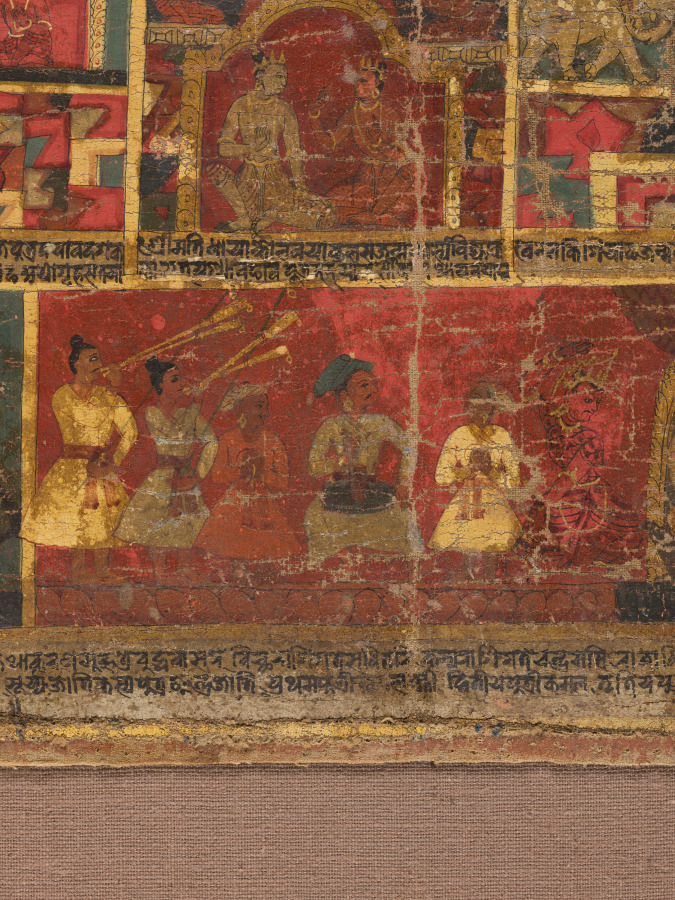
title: Bejeweled Buddha Preaching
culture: Nepal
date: 1648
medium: Gum tempera, ink, and gold on cloth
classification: Painting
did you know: Nepalese devotional paintings on cloth are called "paubha" in the Newari language.